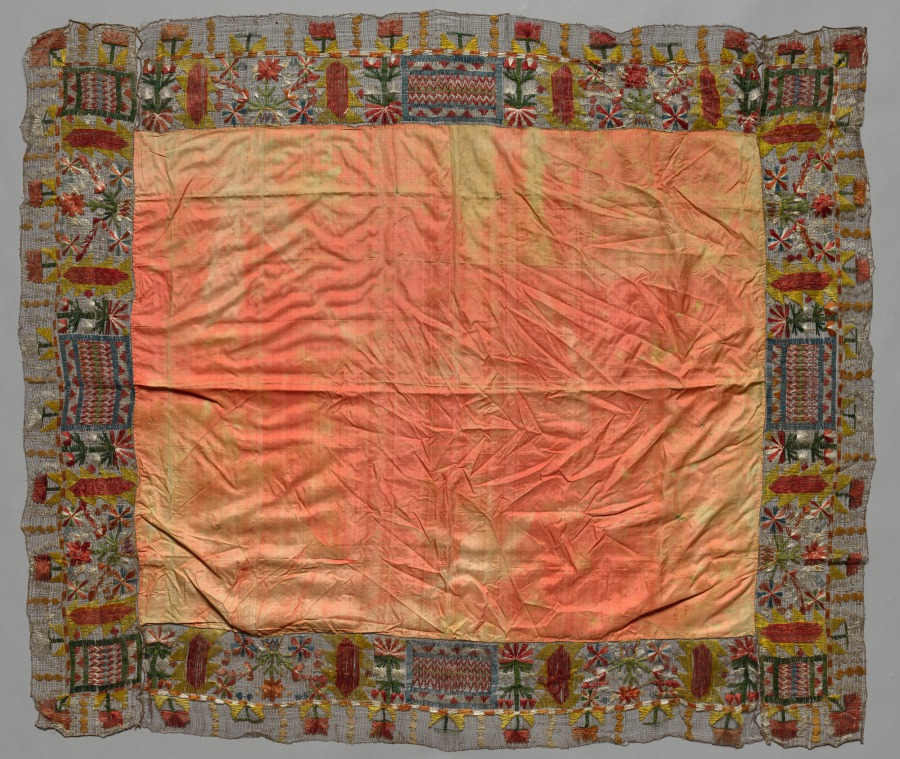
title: Cover with Border of Abstract Floral Motifs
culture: Italy ?, 1700s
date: 1700s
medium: Rose silk (est.) center: plain weave Silk (est.) embroidery on unidentified ground fiber border: needle lace, burato (twined ground and darned in one direction)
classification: Lace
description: Notable for its bright and valued colors, this cover has a needle lace border of natural and organic motifs attached to a silk cloth. The lace is divided into two registers, possibly representing stylized plants and flowers growing above ground with their roots growing in pots beneath them.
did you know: The large size and square form suggest that this textile would likely have been used as a table cloth.